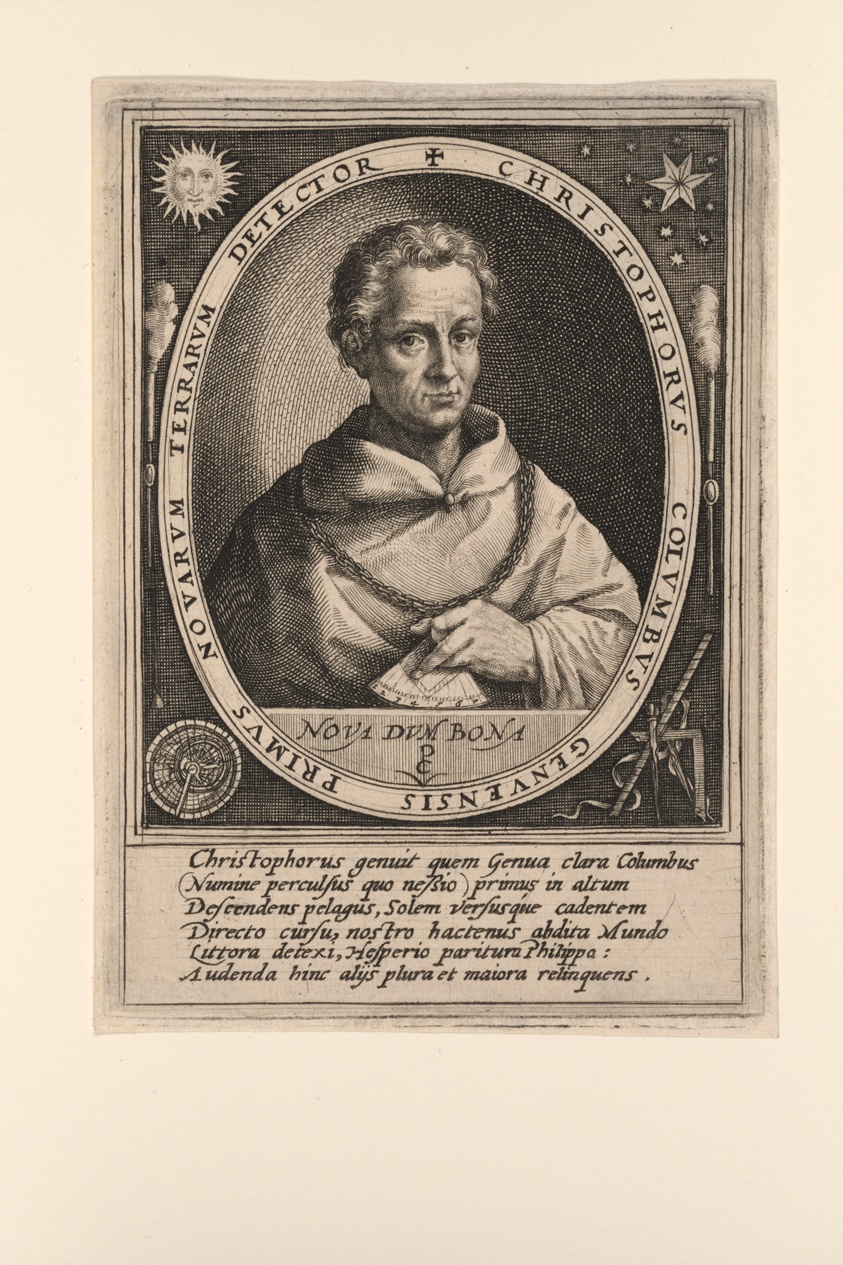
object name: Print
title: Christopher Columbus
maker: Crispijn van de Passe I; Dutch, c. 1565–1637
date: 1590/98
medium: Engraving on paper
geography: Netherlands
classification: engraving; paper; print; prints and drawing